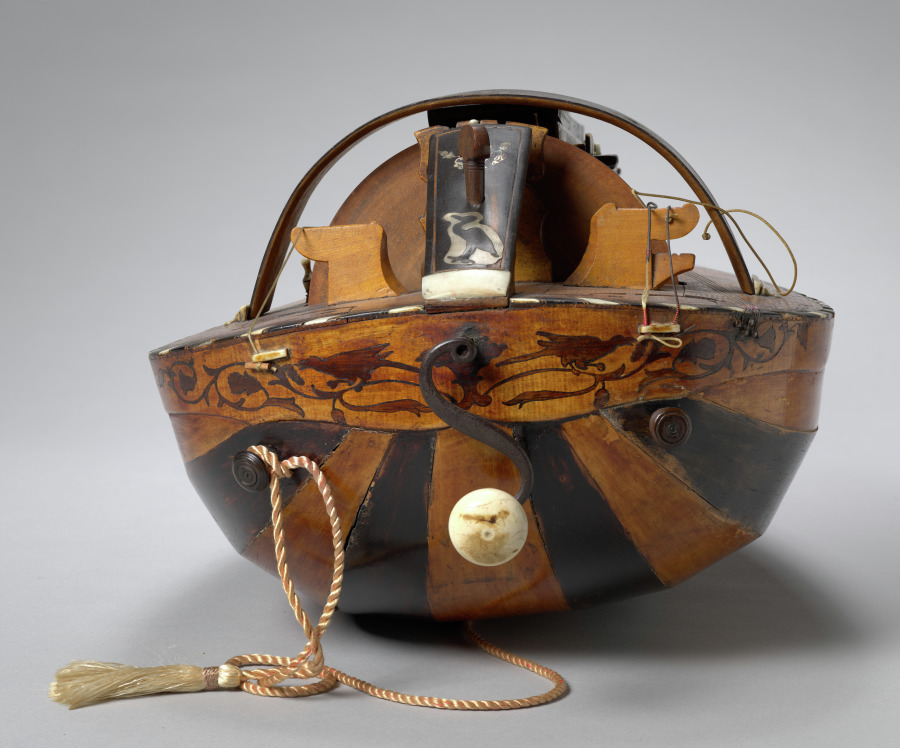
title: Vielle à Roue (Hurdy-Gurdy)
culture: France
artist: Jacques Decante (French, 1808–1884)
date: 1865–70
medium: Wood; mother-of-pearl inlay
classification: Musical Instrument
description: In France, the hurdy-gurdy is known as the vielle à roue (wheel fiddle). This six-stringed musical instrument produces sound by a hand crank-turned wheel that rubs against the strings. The wheel functions much like a violin bow, and single notes sound similar to those of a violin. Melodies are played on a keyboard that presses small wedges against the strings to change their pitch.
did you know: This vielle à roue was made in the French village of Jenzat, which was the manufacturing center for hurdy-gurdies during the 19th century.